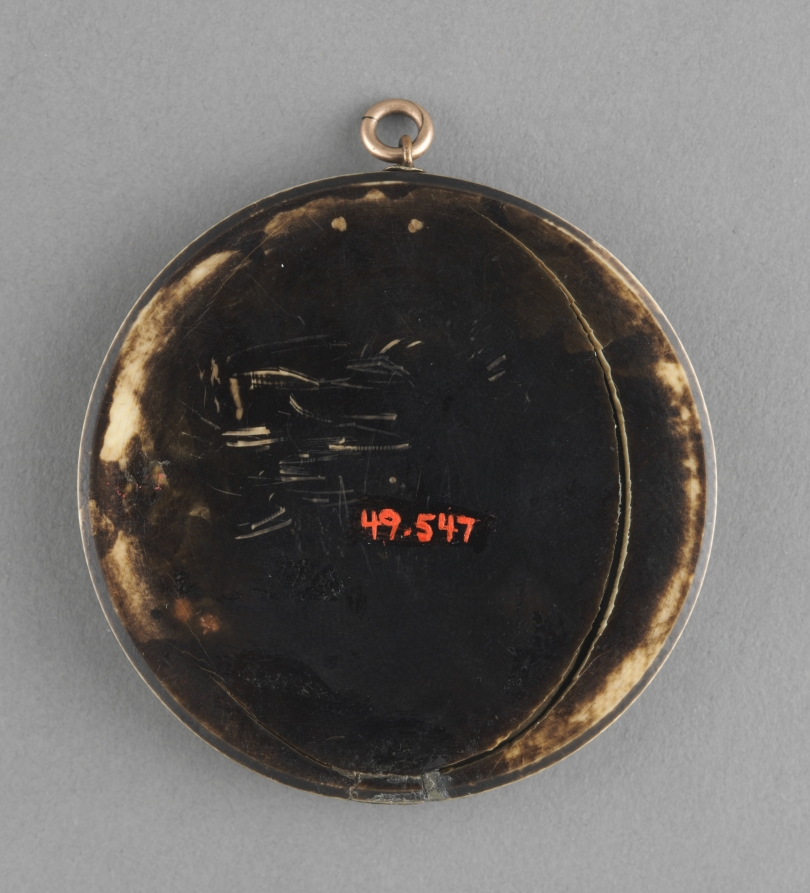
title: Portrait of Lucy Russell, Countess of Bedford, née Harrington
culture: England, 17th century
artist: studio of Isaac Oliver (French, c. 1565–1617)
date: 1612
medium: watercolor on vellum with gold and silver in original stained ivory case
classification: Portrait Miniature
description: Although the identity of the lady is uncertain, she must have been a wealthy woman, judging by her heavy and elaborate jewelry, complete with necklace, chain, earrings, jewel-encrusted dress and a kind of aigrette in her hair. In an age when clothes were assumed to be an accurate indicator of status, it was judged essential to wear your wealth, especially when immortalized in a portrait. Oliver painted the woman's pearl earrings using Nicholas Hilliard's jewelling technique, which involved laying a raised blob of white lead paint with some shadowing to one side. This form was then crowned with a rounded touch of real silver that was burnished with, to quote Hilliard, "a pretty little tooth of some ferret or stoat or other wild little beast." This technique brought the silver to a sparkling highlight, while actual gold is used to paint the pearl's gold setting. Silver tarnishes with age, therefore, the pearl earrings now appear black.